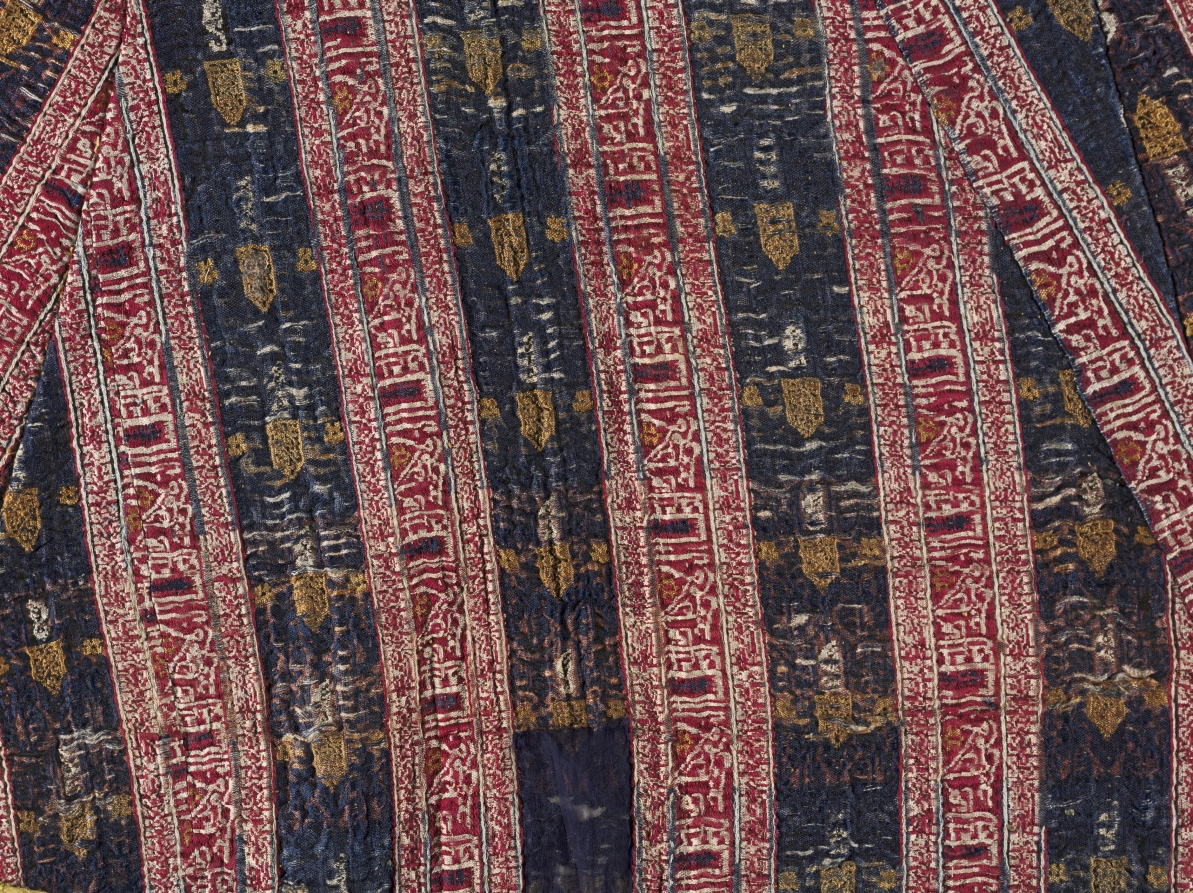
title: Mantle for a statue of the Virgin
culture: Spain, Granada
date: late 1400s–1500s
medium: Silk: lampas weave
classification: Textile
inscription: on red ground is Naskhi inscription "Glory to our Lord, the Sultan" in white.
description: A striped silk textile, probably made for use in the Islamic Alhambra palatine complex, was turned into a mantle for a statue of the Virgin Mary. On the crimson stripes the salutation that occurs as ornamental text throughout the Alhambra, Glory to our Lord the Sultan, repeats in Arabic script.